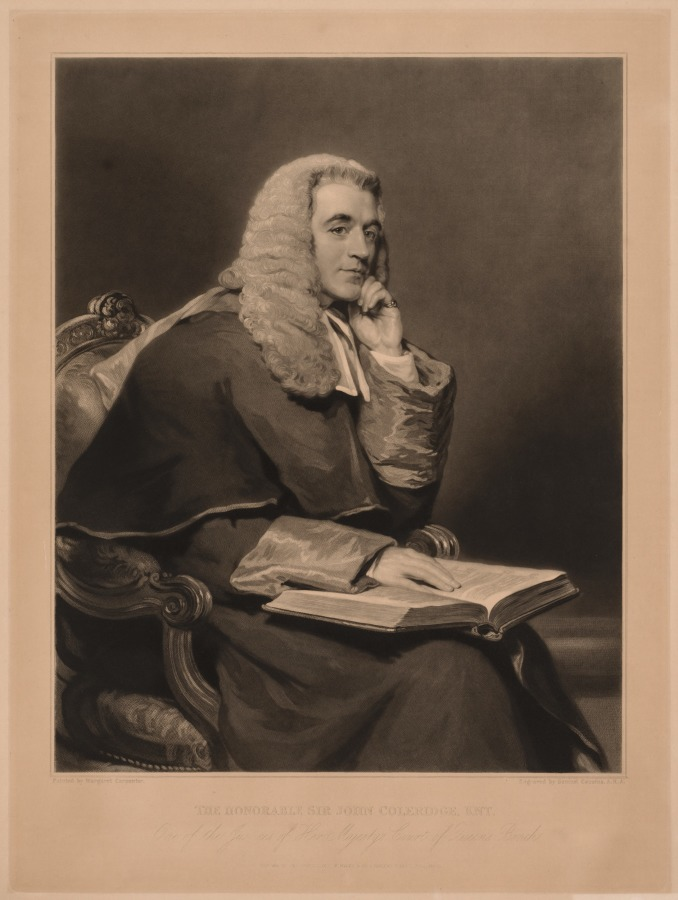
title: Sir John Taylor Coleridge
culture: England, 19th century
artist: Samuel Cousins (British, 1801–1887)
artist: after Margaret Sarah Carpenter (British (modern), 1793–1872)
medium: mezzotint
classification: Print